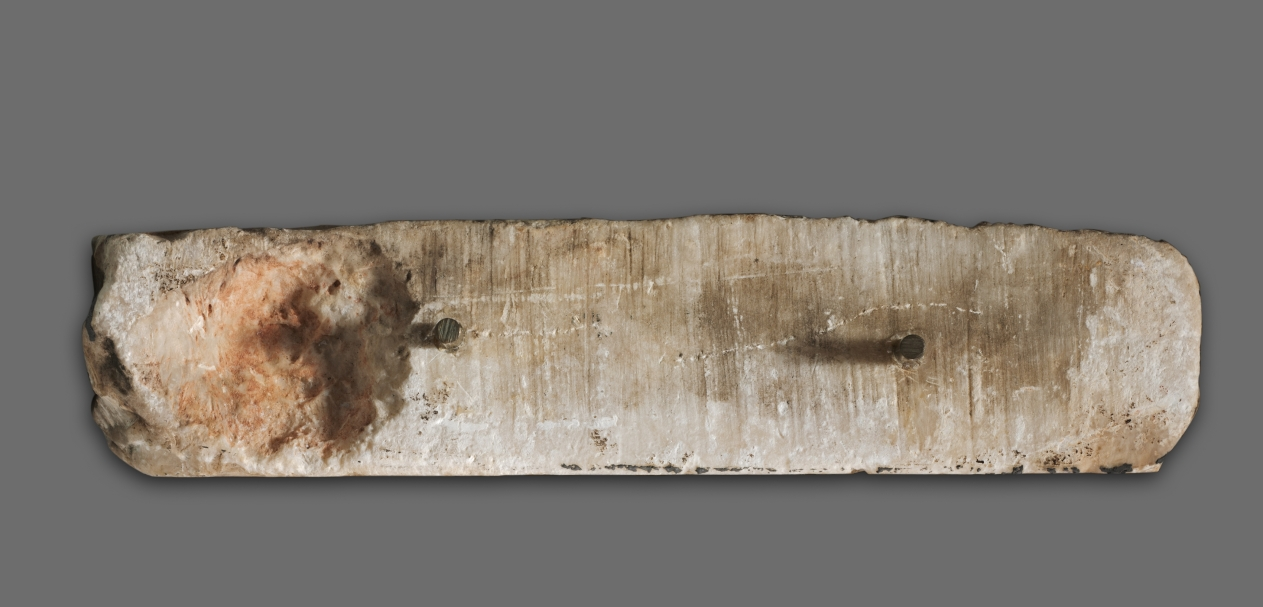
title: Christ Carrying the Cross with Saints Simon and Veronica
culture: South Netherlands, Hainault, 16th century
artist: workshop of Jacques Dubroeucq (Netherlandish, 1500/10–1584)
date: c. 1545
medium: alabaster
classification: Sculpture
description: As Christ dragged his cross through the streets of Jerusalem, Veronica wiped sweat from Christ’s face, which was miraculously imprinted on the fabric. This relief probably came from a choir screen, a barrier between the altar and the congregation, common in medieval churches. Yet the sculpture is more classical than medieval. The artist, yet to be identified, clearly knew the work of Dubreoucq, an artist who brought a taste for Italian Renaissance sculpture to northern France and present-day Belgium. The use of alabaster instead of marble exploits a material local to this part of Europe.